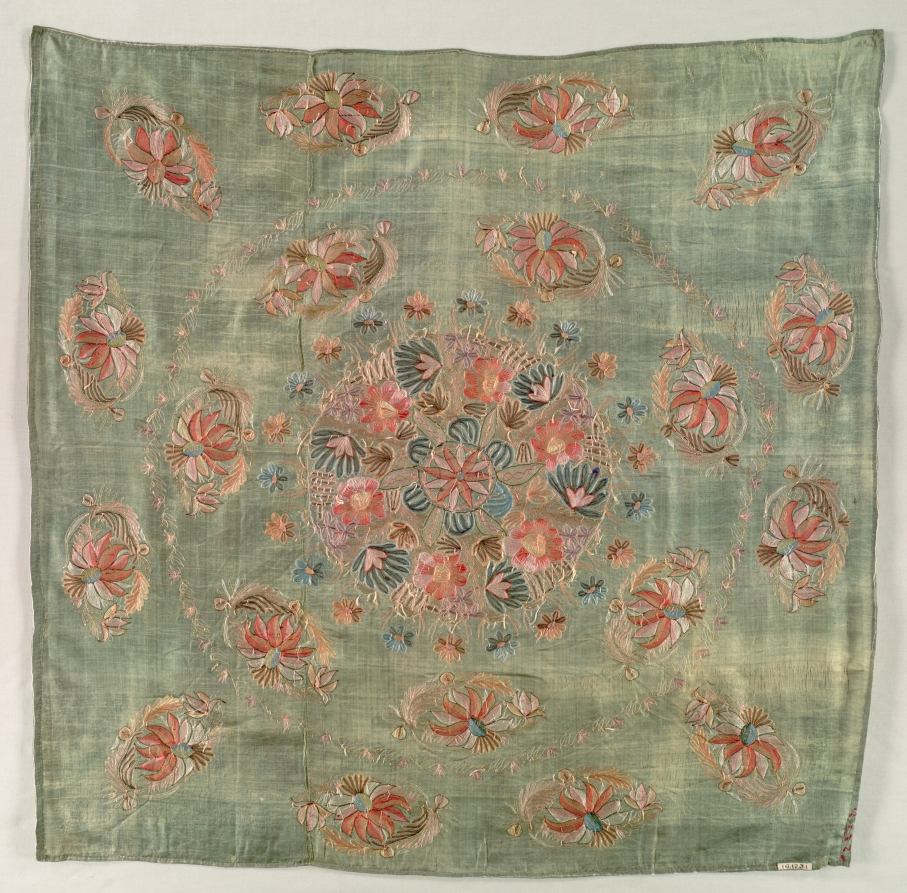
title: Embroidered Square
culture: Turkey, 19th century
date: 19th century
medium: embroidery, silk and metallic threads, on silk tabby ground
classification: Embroidery